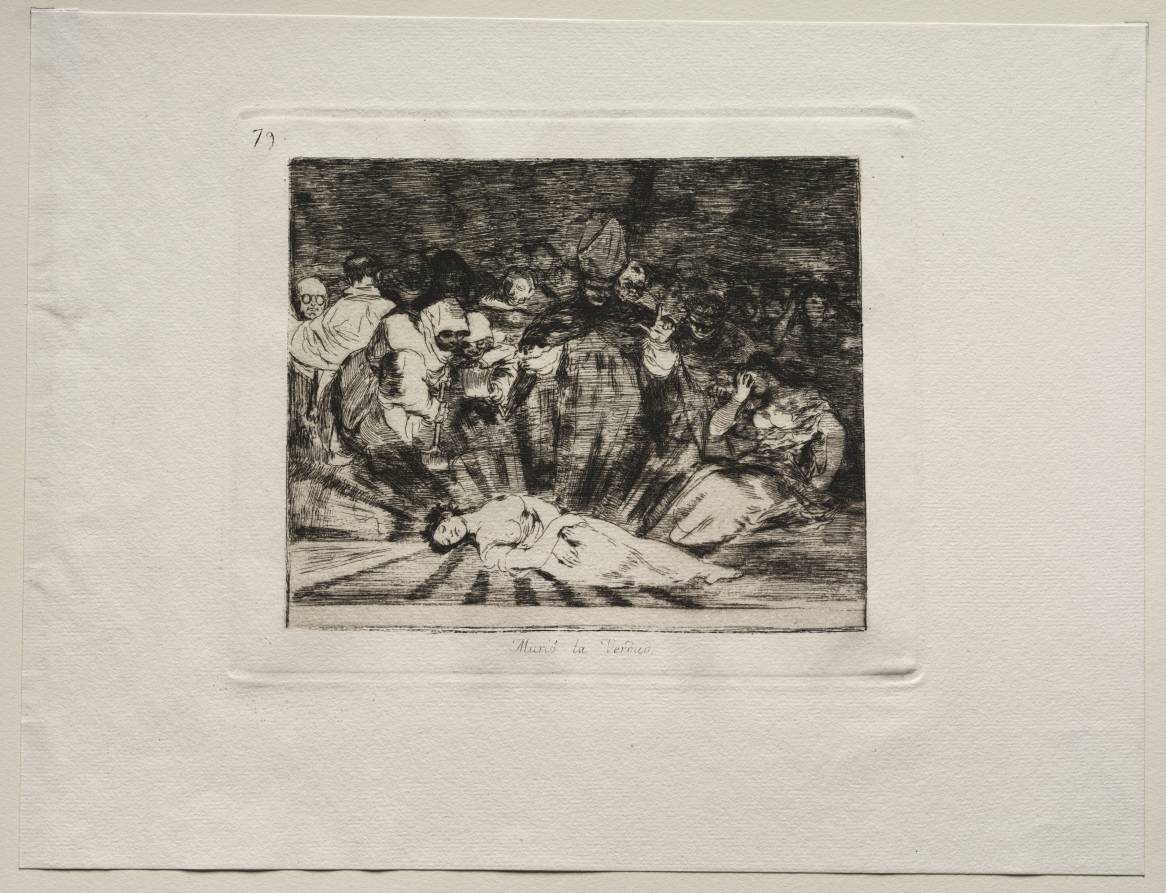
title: The Horrors of War: Truth Has Died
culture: Spain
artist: Francisco de Goya (Spanish, 1746–1828)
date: c. 1810–20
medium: etching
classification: Print